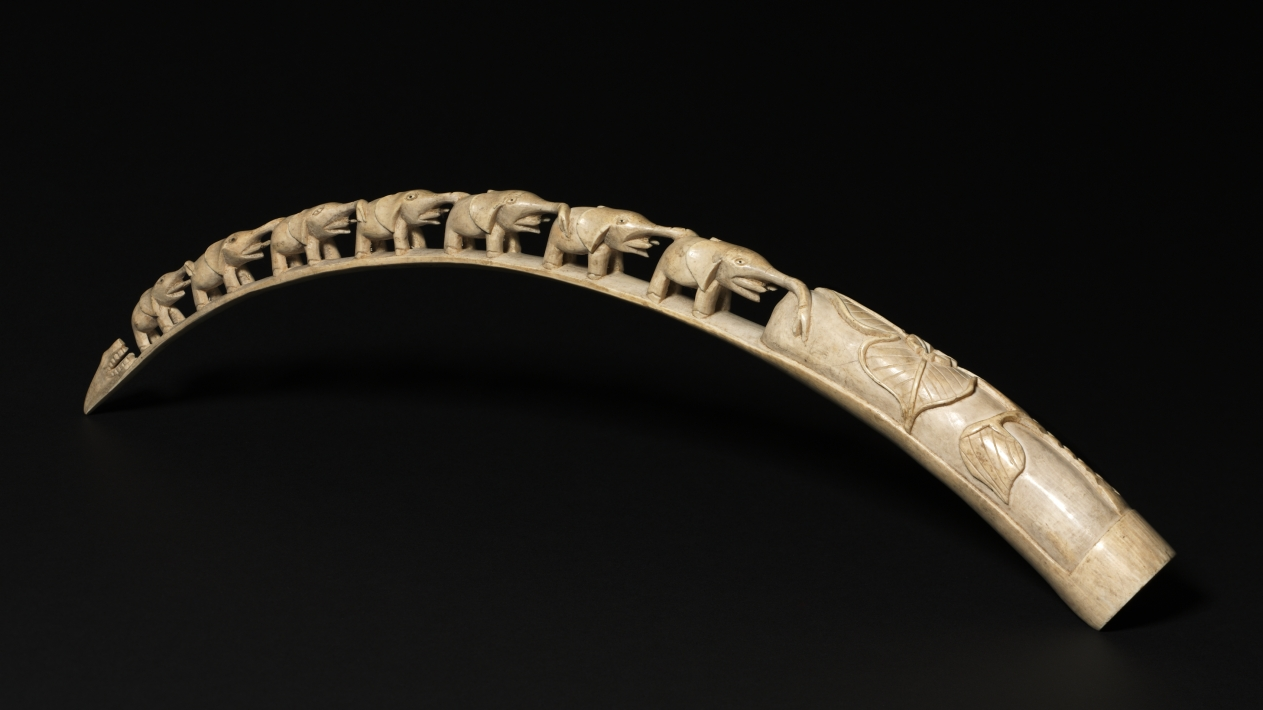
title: "Elephant Bridge" souvenir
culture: Central Africa, Democratic Republic of the Congo, 20th century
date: 1900s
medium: Elephant ivory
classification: Sculpture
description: This carving was made to appeal to Europeans and Americans in Central Africa, and did not draw from local aesthetics. It depicts an "elephant bridge," where the pachyderms are arranged with trunks and tails touching along the natural curve of an ivory tusk. Such compositions were often made in Japan, India, or China.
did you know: Skilled carvers in Central Africa could easily imitate other styles presented by patrons who commissioned works, such as this Congolese take on an Asian composition of elephants.